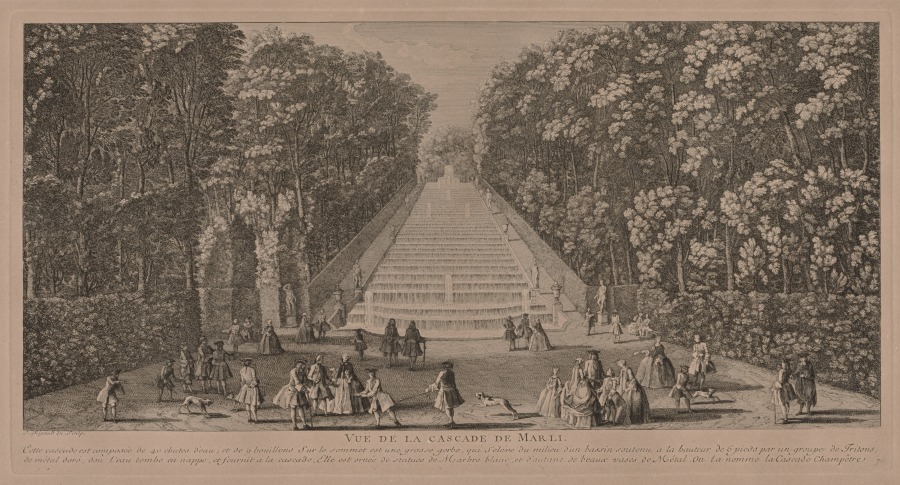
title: The Cascade at Marli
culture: France, 18th century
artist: Jacques Rigaud (French, 1681–1754)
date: c. 1720–50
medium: engraving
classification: Print